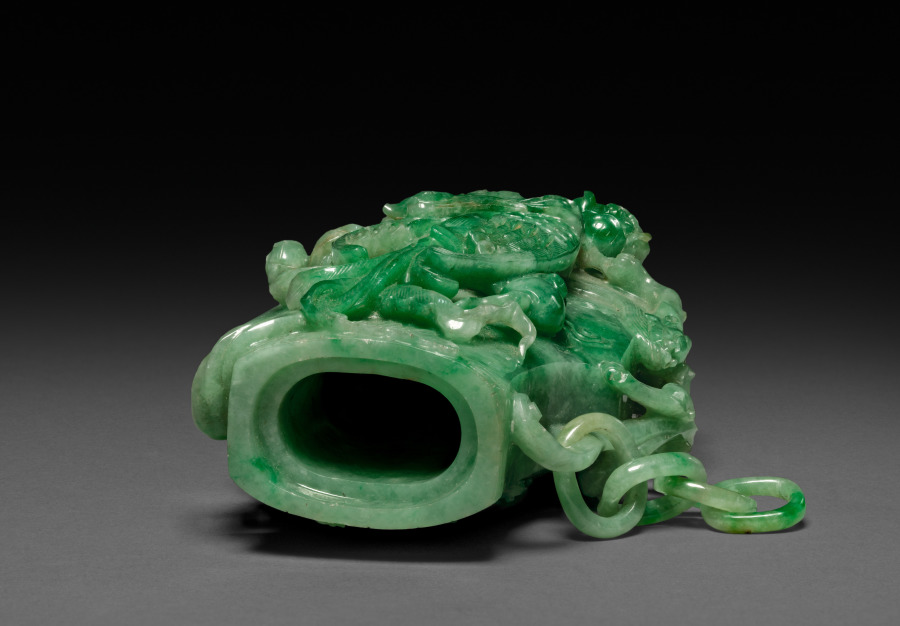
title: Three-Sectional Altar Group: Cylindrical Carving with Phoenix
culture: China, Qing dynasty (1644-1911)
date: 1644–1911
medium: jade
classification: Jade